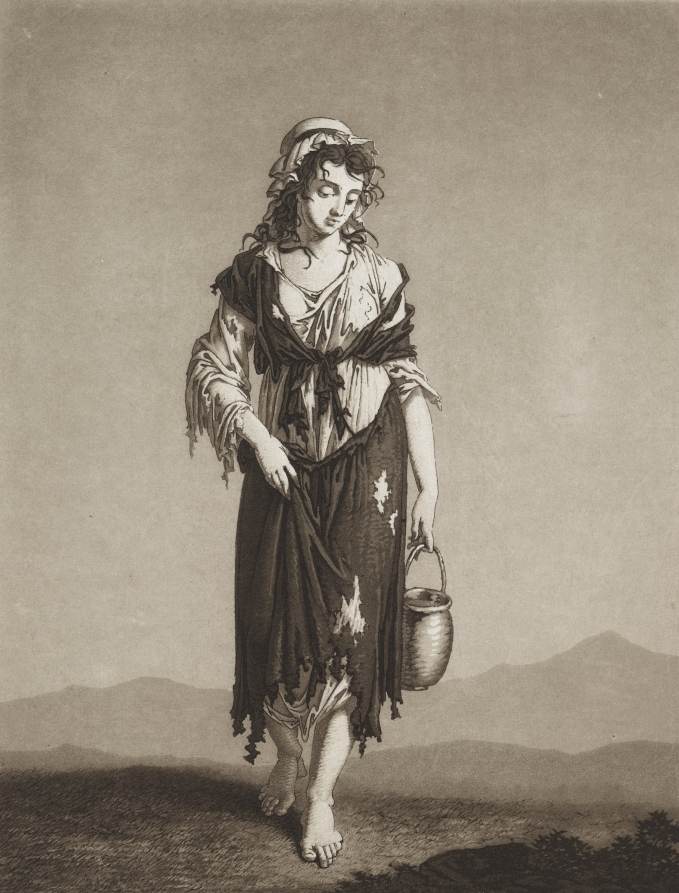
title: The Young Beggars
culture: Germany, late 18th-early 19th century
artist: Karl Ludwig Bernhard Buchhorn (German, 1770–1856)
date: c. 1800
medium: aquatint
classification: Print